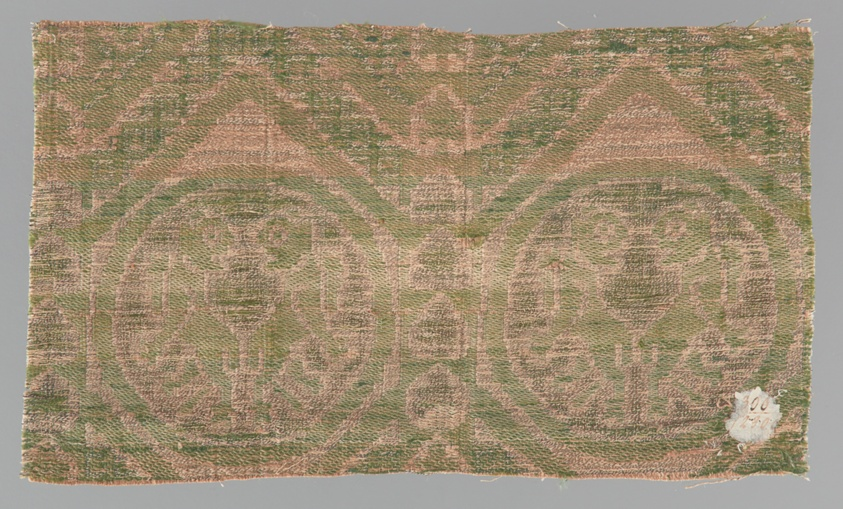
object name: Textile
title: Fragment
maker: Spain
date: 13th/14th century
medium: Silk, linen, and gilt-animal-substrate-wrapped linen, weft-faced three-color complementary weft twill weave with inner warps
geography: Spain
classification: textile; weaving